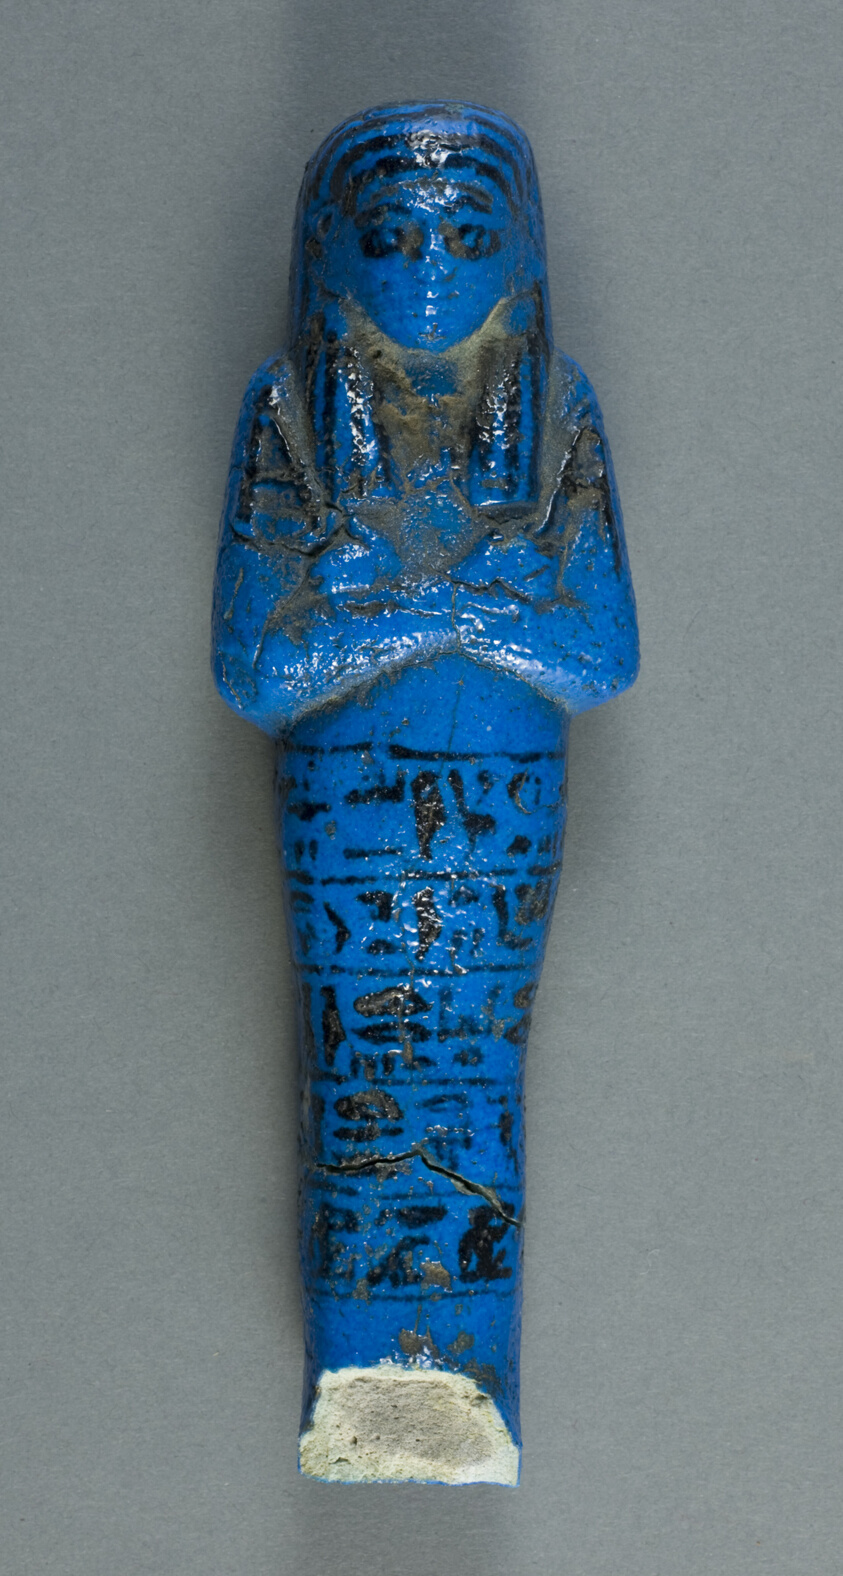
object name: Funerary Object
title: Shabti of the Supreme Chief of the ḫnr.t of Amun Nesikhonsu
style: egyptian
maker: Egyptian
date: Third Intermediate Period, Dynasty 21 (about 1069–945 BCE)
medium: Faience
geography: Egypt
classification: ushabti; wood; funerary; figurine; ancient art; faïence (composite material)